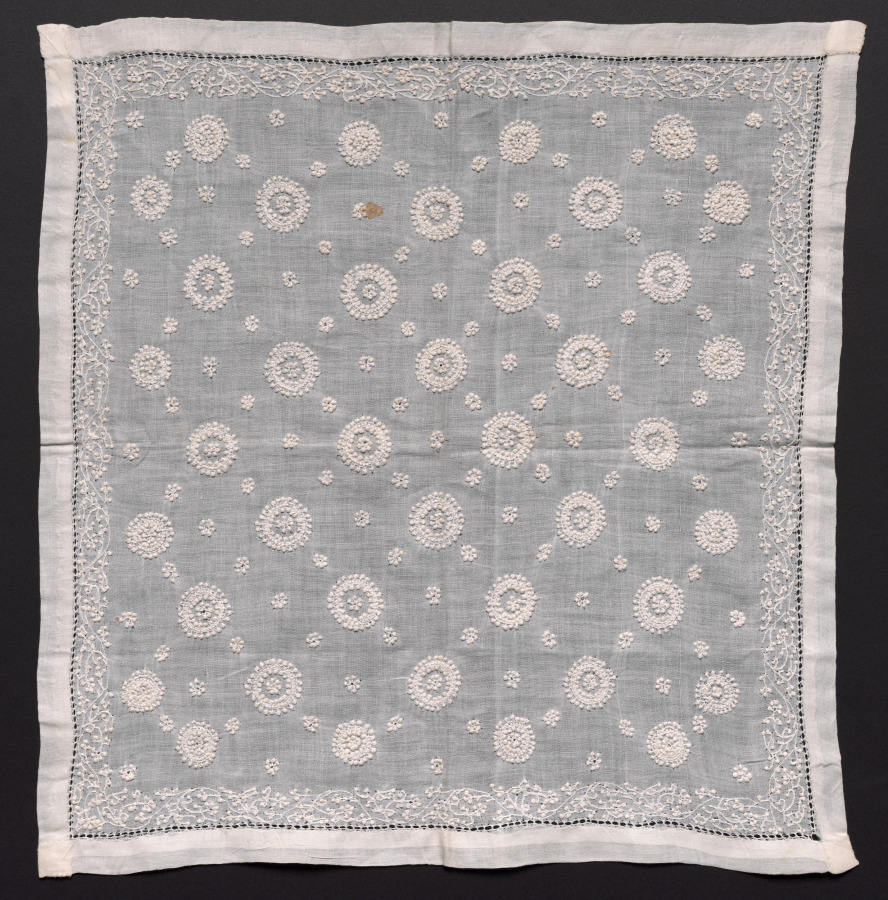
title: Square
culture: France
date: 1800s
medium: Plain weave linen: embroidered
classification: Embroidery